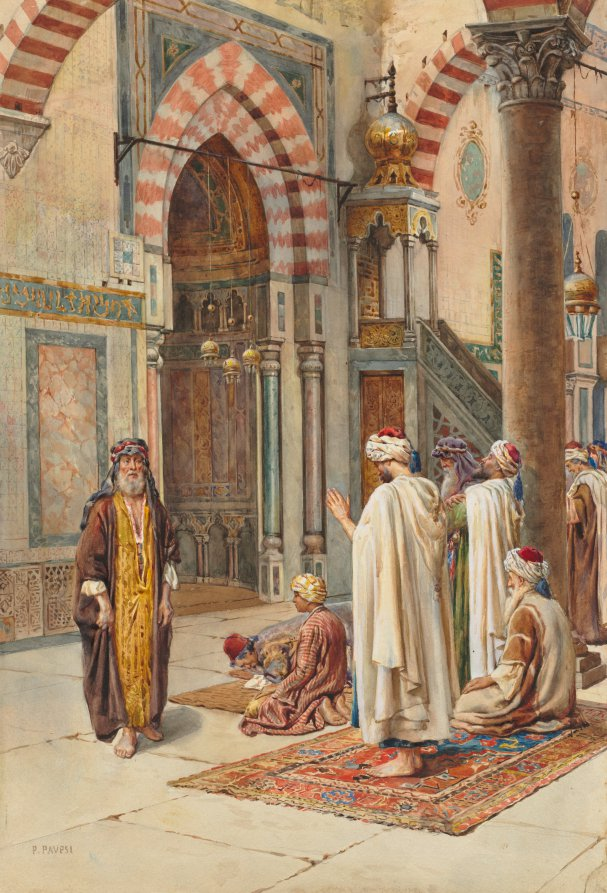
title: Moslems at Prayer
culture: late 19th-early 20th century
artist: P. Pavesi (Italian)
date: late 1800s-early 1900s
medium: watercolor on heavy board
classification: Drawing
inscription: Signed lower right: P. Pavpsi